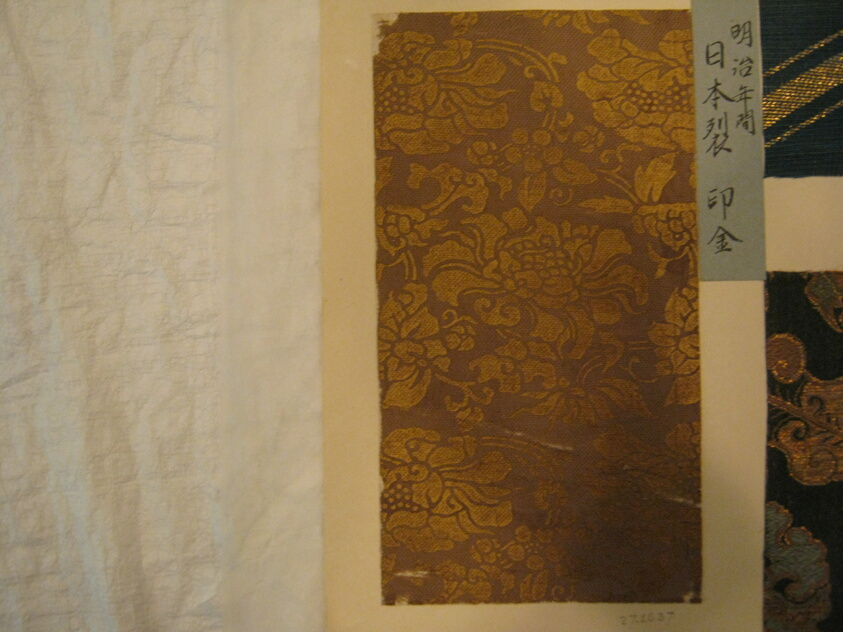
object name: Textile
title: Fragment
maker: Japan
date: 18th/19th century, Edo period (1615–1868)/ Meiji period (1868–1912)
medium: Plain simple cloth, silk, stencilled with gold.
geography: Japan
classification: textile; weaving